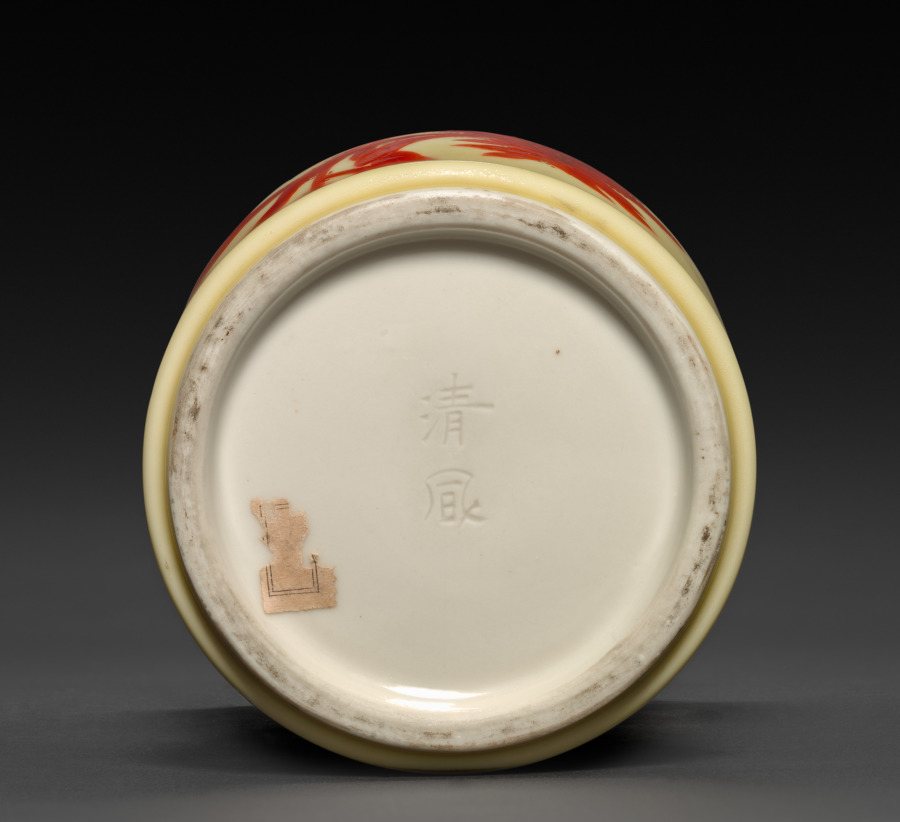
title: Prunus Vase with Amaranth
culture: Japan, Taishō period (1912–26)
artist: Seifū Yohei IV (Japanese, 1872–1951)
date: 1914–46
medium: Porcelain with yellow glaze and overglaze color enamel and gold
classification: Ceramic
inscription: 清風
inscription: 渡邊所藏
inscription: 清風造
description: Yohei IV’s interest in bold, colorful designs is on full display in this vase shaped like a “prunus vase,” or meiping (Japanese meipin). It has two colors of amaranthus on a yellow ground. It follows a design appearing on a sleeve-shaped vase by Yohei III. Yohei IV uses bright spring-green dots of overglaze enamel to suggest a ground plane in his yellow environment; he also uses red and magenta accented with wild gold cascades of dots for two plants he places on opposite sides of the vase, one much larger than the other. In Yohei III’s version, the body of the vessel is white, and the foliage of one plant is red with carefully painted veins in gold, while another plant strategically positioned behind it has a deep rust color, again carefully detailed in gold. In a sense, Yohei IV has deconstructed his father’s logical, balanced design and re-presented it as an emotive, lightheartedly chaotic one that sates the appetite for instant gratification, much as his father’s creation rewards the pursuit of elegance.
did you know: Seifū Yohei IV continued to create works in the studio’s signature colors but also produced pieces with strong color and flare that were his interpretations of Qing dynasty (1644–1911) glazes.